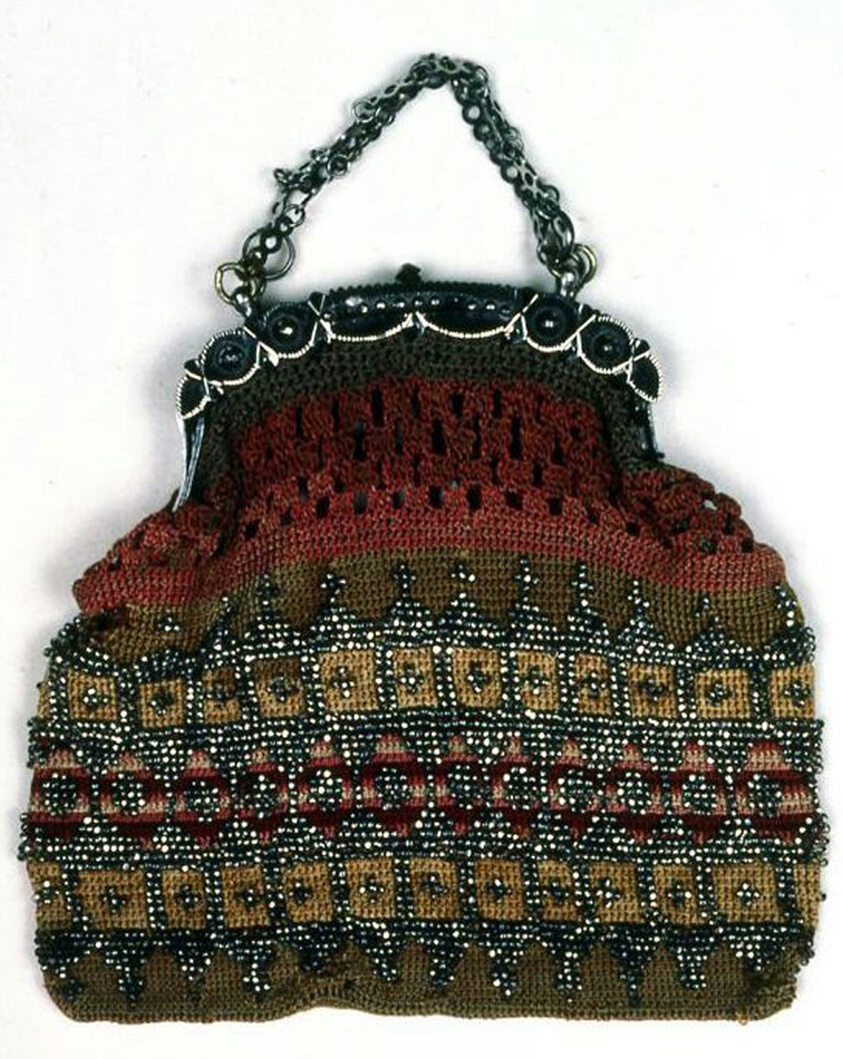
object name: Costume and Accessories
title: Bag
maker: United States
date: c. 1840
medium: Silk, double crochet stitch with metal beads and areas of openwork formed by double and treble crochet stitch combination; sewn to metal clasp and chain with silk thread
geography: United States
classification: textile; bag - needlework; costume accessory - bag; costume